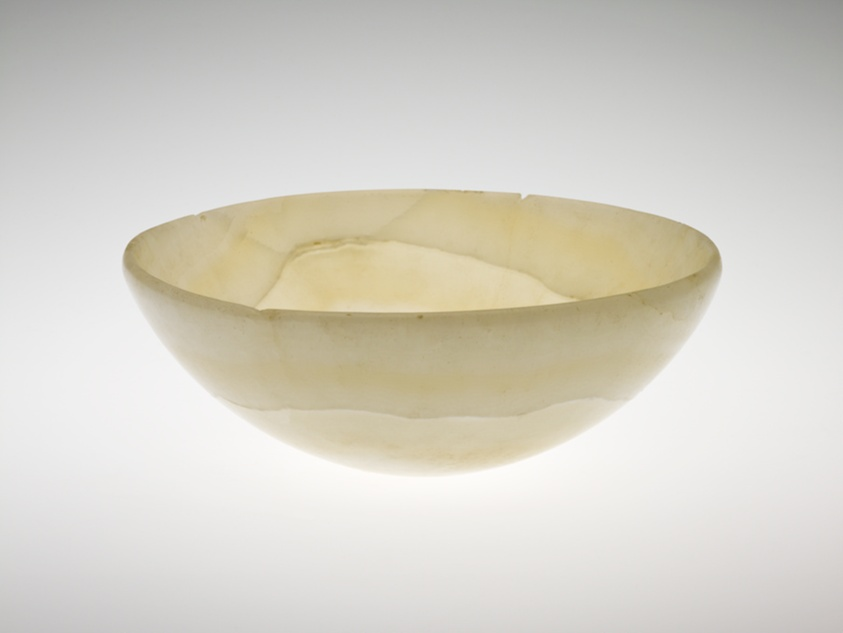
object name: Vessel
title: Bowl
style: old kingdom, early dynastic (egyptian), ancient, predynastic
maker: Egyptian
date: Predynastic Period–Old Kingdom, Naqada II–Dynasty 6 (about 3500–2181 BCE)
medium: Travertine (Egyptian alabaster)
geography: Egypt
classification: vessel; stone; ancient art; bowl